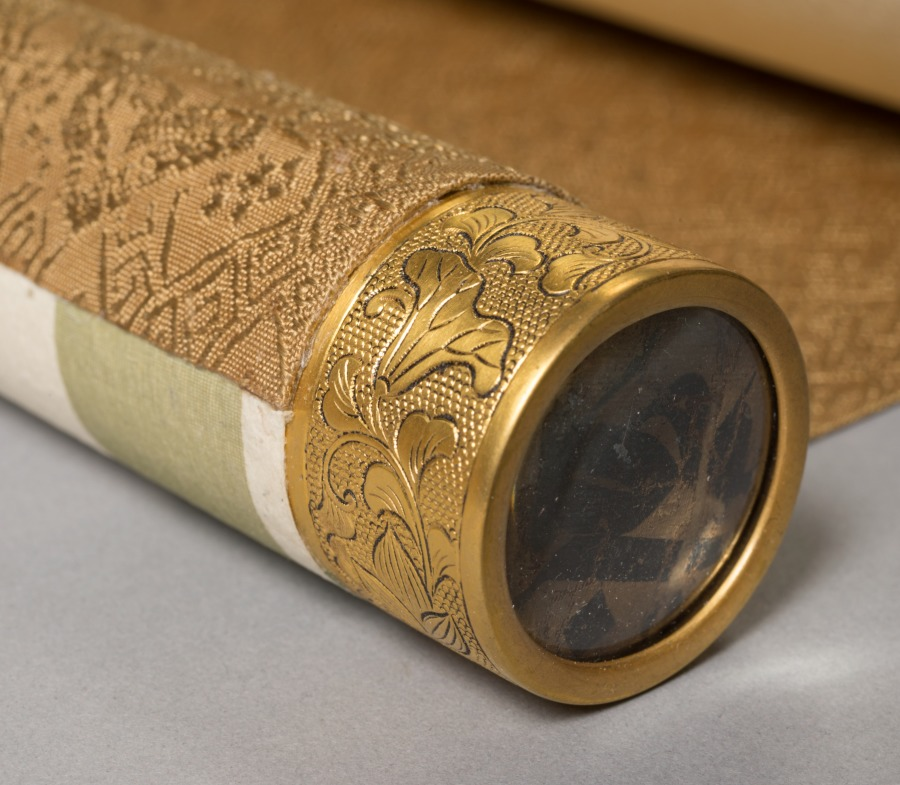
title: Eleven-Headed Kannon (Jūichimen Kannon)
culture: Japan, Kamakura period (1185–1333)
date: 1200s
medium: hanging scroll; color and cut gold (kirikane) on silk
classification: Painting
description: The Eleven-Headed Kannon, a deity of mercy and compassion in the Buddhist pantheon, was introduced into Japan in the 600s. By the 700s it had gained in popularity among an increasing number of believers, a condition it enjoyed until the end of the Kamakura period. The modest size and high quality of the materials apparent in this work indicate its use as a private devotional image. An earlier restoration of this painting included the use of an entire silk backing layer rather than silk patches with a paper backing. The tension that resulted between these two layers of silk, one old and the other recent, caused serious cracking to occur in the painting's surface. Moreover, the silk backing had been dyed a dark tone which did not enhance the appearance of the painting, although it did help hide damaged areas in the surface silk. Now two layers of backing paper support the painting, with its carefully fitted silk patches. These are toned slightly differently from the original surface values so that viewers can distinguish between the original and the modern restored areas. The original metal fittings have also been cleaned and reused. Other replacement fittings were deemed inappropriate for this early religious image and so new, specially designed ones are now in place.